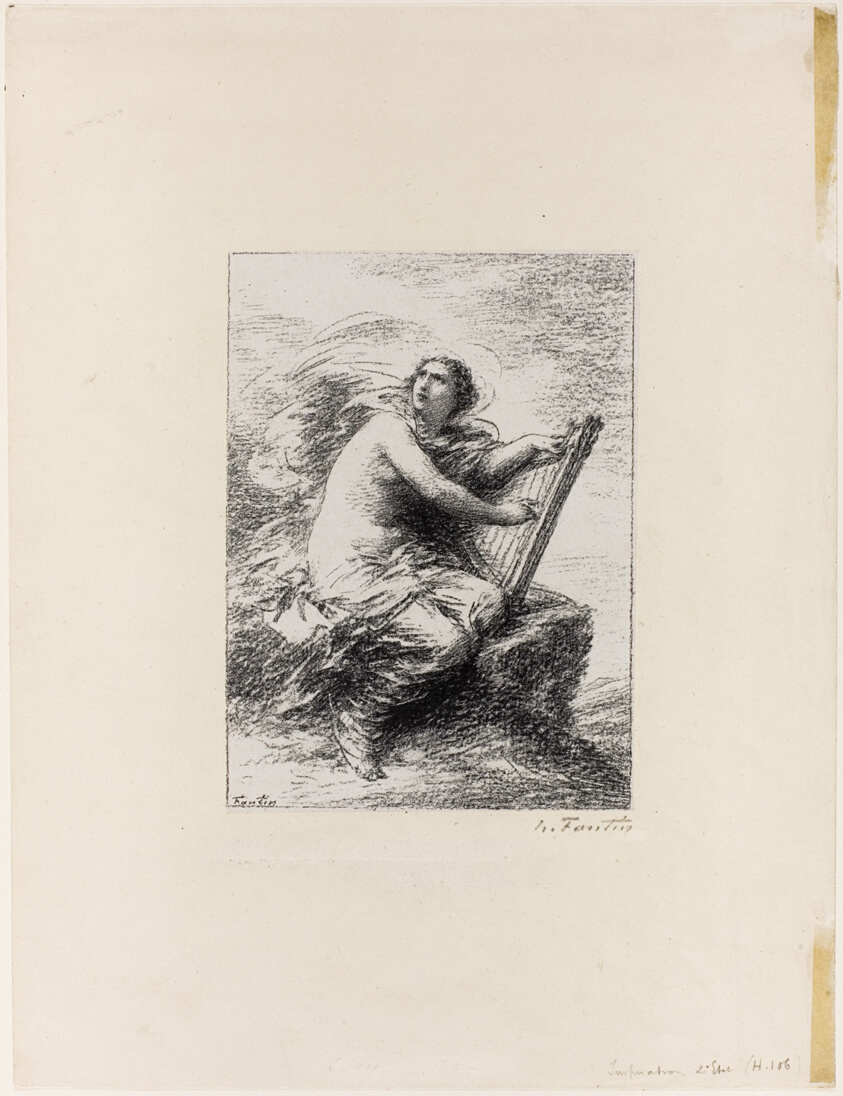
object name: Print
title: Inspiration, first plate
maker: Henri Fantin-Latour (French, 1836-1904)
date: 1892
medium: Lithograph in black on white China paper laid down on ivory wove paper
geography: France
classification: lithograph; print; prints and drawing